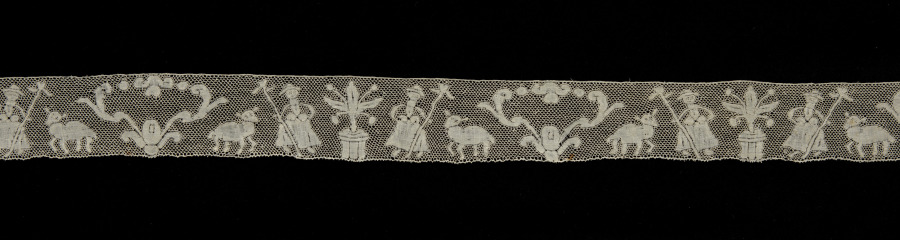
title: Lace Edging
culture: France, Valenciennes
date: 1700s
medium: Linen: bobbin lace (Valenciennes)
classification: Lace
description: This lace edging depicts shepherdesses, lambs, and flowering plants.